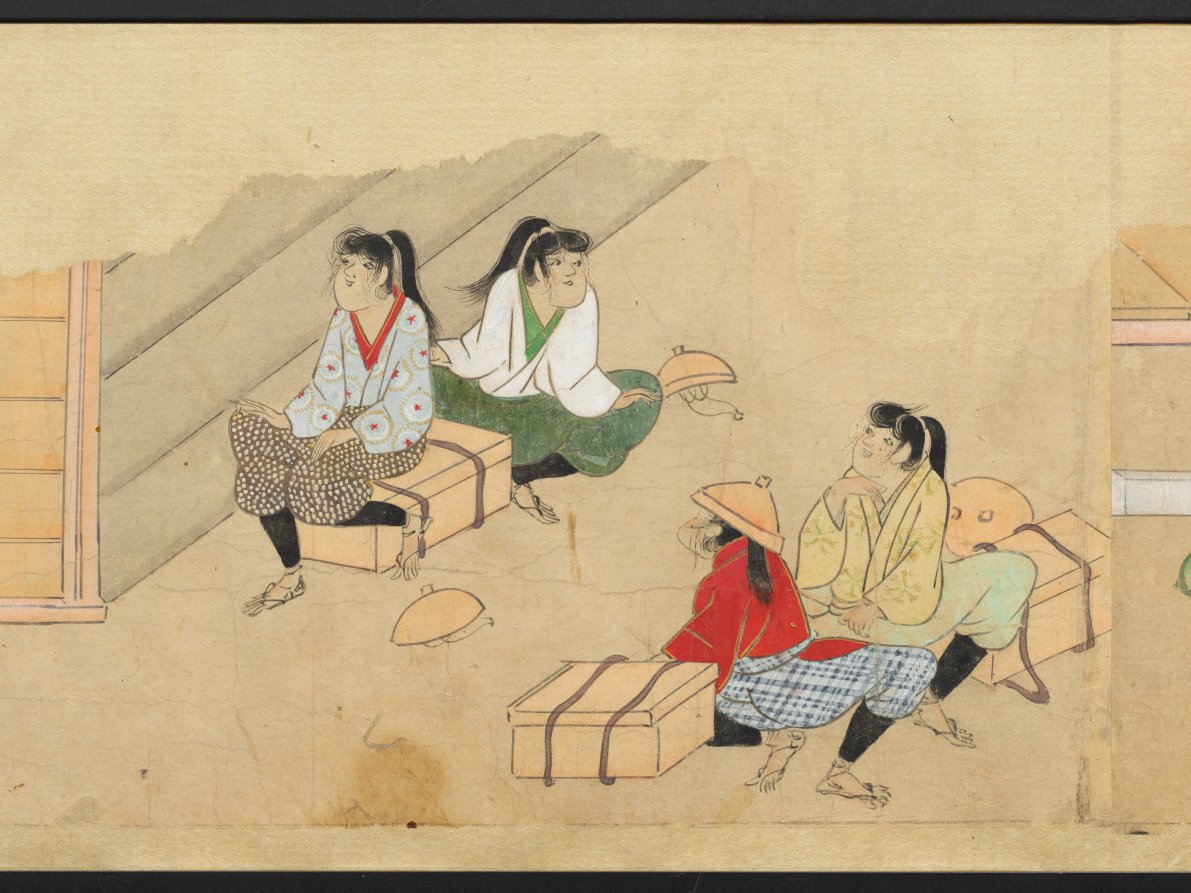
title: The Saltmaker's Story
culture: Japan, Edo period (1615–1868)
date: early 1600s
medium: One of a pair of handscrolls; ink, color, and gold on paper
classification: Painting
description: Once read and copied by girls at New Year’s celebrations and included in dowries, The Saltmaker’s Story is a rags-to-riches tale in which daughters are gifts from the gods. Despite his simple outlook, the main character progresses from humble roots as an associate at Kashima Shrine to the elite status of grandfather of the emperor through the intervention of the Kashima deity. The Saltmaker’s Story is traditionally presented in a set of three scrolls, but the text of this set has been removed by a previous owner, who remounted the illustrations as a pair. The paintings of this one take us from right to left through the second half of the tale.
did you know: This handscroll originally had texts before its paintings, but the texts were removed.